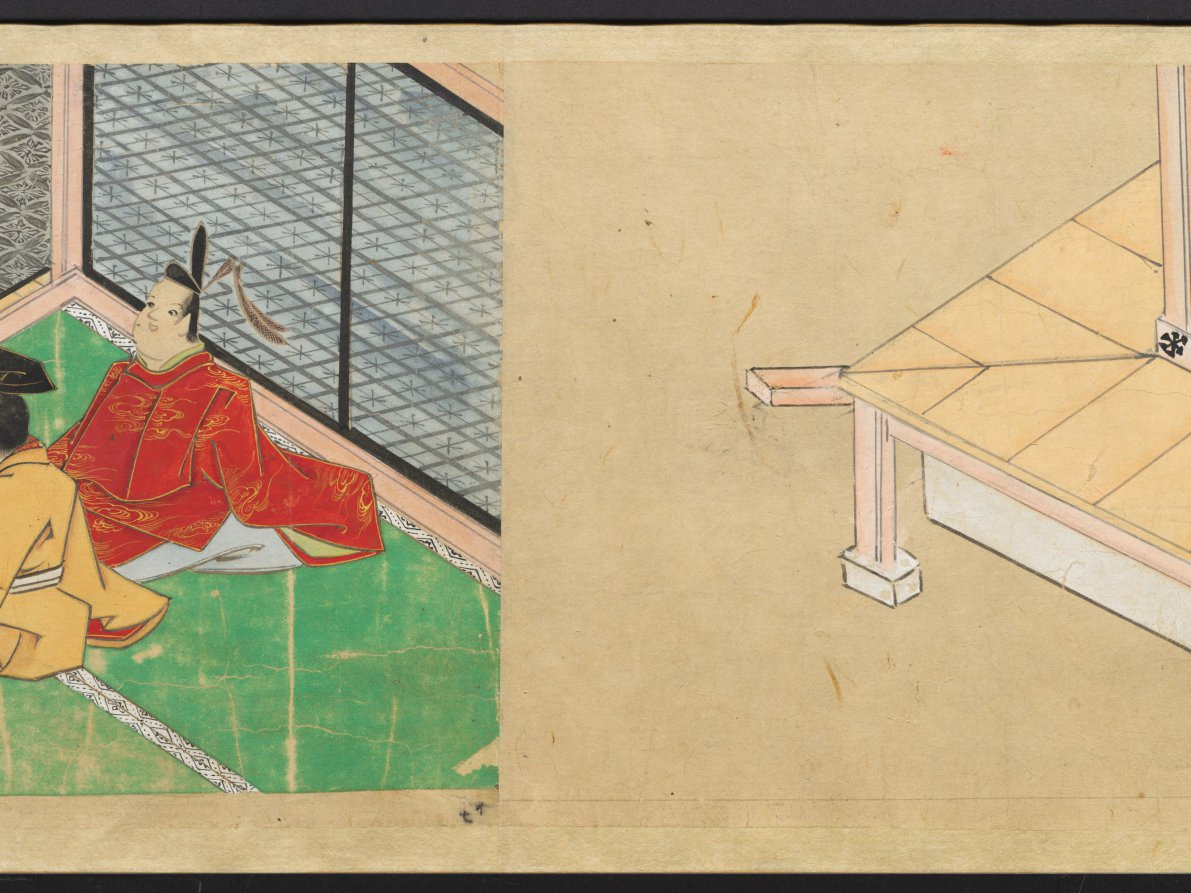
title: The Saltmaker's Story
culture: Japan, Edo period (1615–1868)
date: early 1600s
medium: One of a pair of handscrolls; ink, color, and gold on paper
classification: Painting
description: Once read and copied by girls at New Year’s celebrations and included in dowries, The Saltmaker’s Story is a rags-to-riches tale in which daughters are gifts from the gods. Despite his simple outlook, the main character progresses from humble roots as an associate at Kashima Shrine to the elite status of grandfather of the emperor through the intervention of the Kashima deity. The Saltmaker’s Story is traditionally presented in a set of three scrolls, but the text of this set has been removed by a previous owner, who remounted the illustrations as a pair. The paintings of this one take us from right to left through the first half of the tale.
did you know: This handscroll originally had texts before its paintings, but the texts were removed.